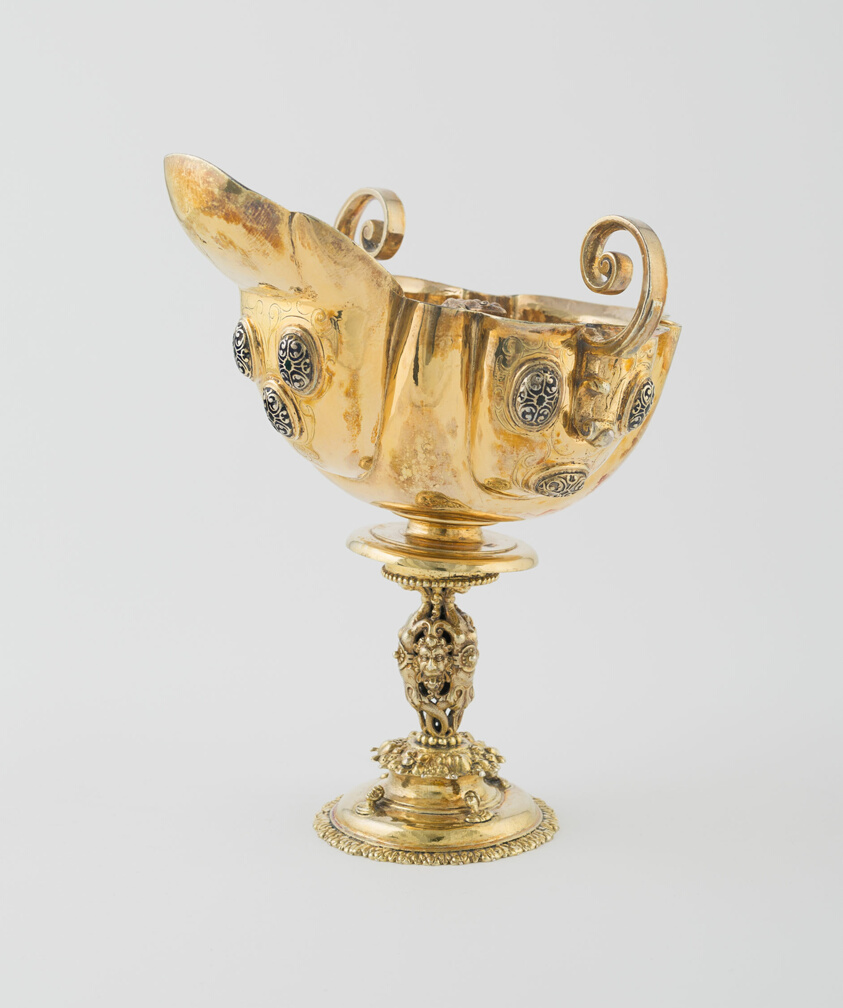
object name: Metalwork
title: Drinking Cup (Bernegal)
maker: Miguel de Urbiola (Active Mexico, 1619-1625)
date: about 1620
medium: Silver gilt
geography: Mexico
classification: drinking vessel; silver; metalwork; european decorative arts